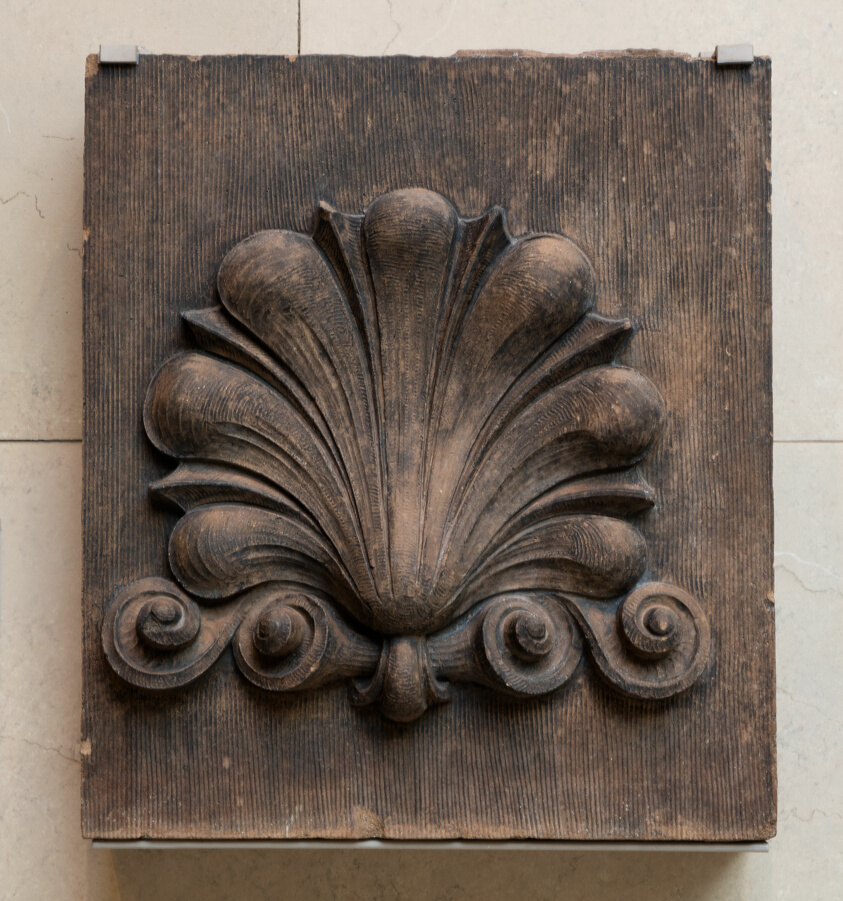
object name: Architectural fragment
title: The Fair Store: Block with Central Shell Shape from Facade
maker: William LeBaron Jenney (American, 1832-1907)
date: 1890/91, addition 1896–97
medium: Terra-cotta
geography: Chicago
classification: architectural fragment; architecture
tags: Chicago